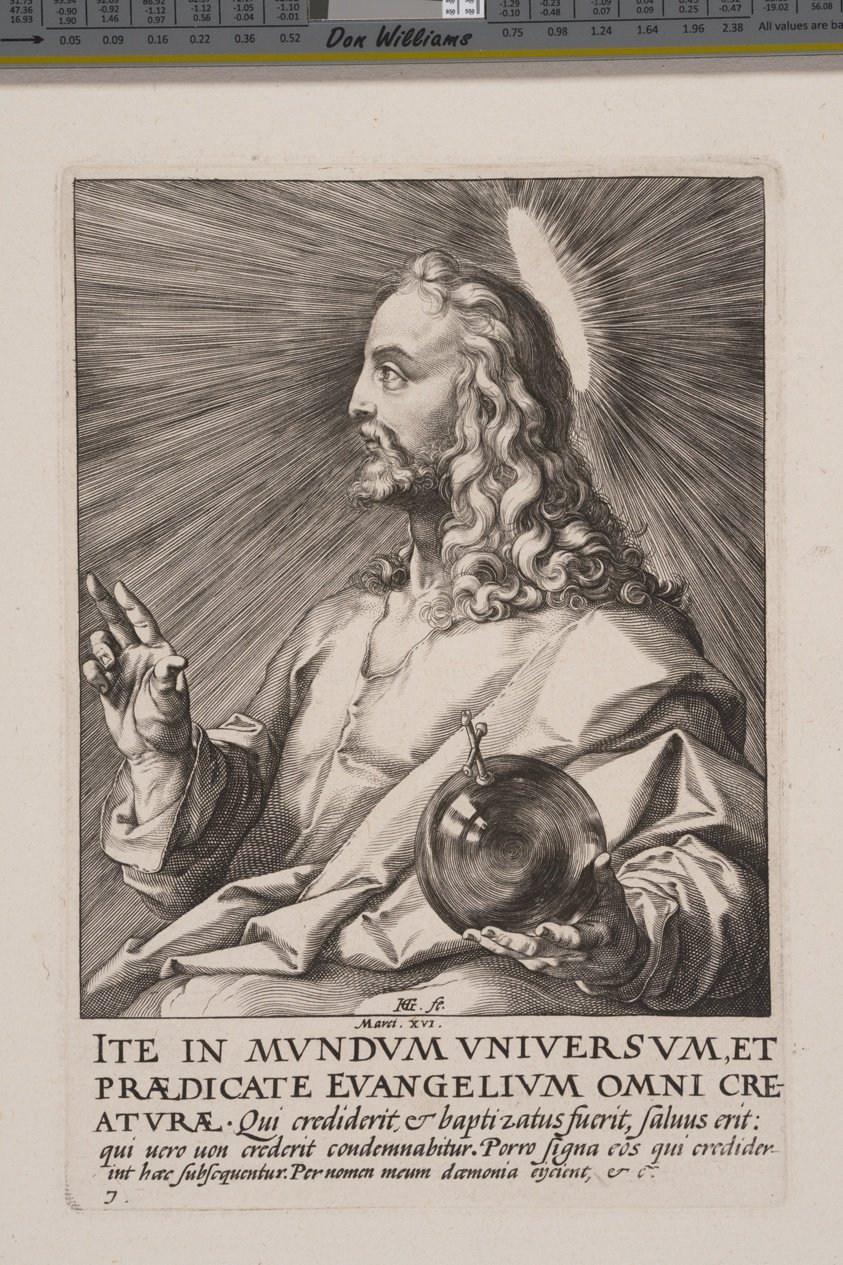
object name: Print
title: Christ (as Salvator Mundi), from Christ, the Apostles and St Paul with the Creed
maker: Hendrick Goltzius (Dutch, 1558–1617)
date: 1589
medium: Engraving on ivory laid paper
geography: Netherlands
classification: print; paper; prints and drawing; engraving